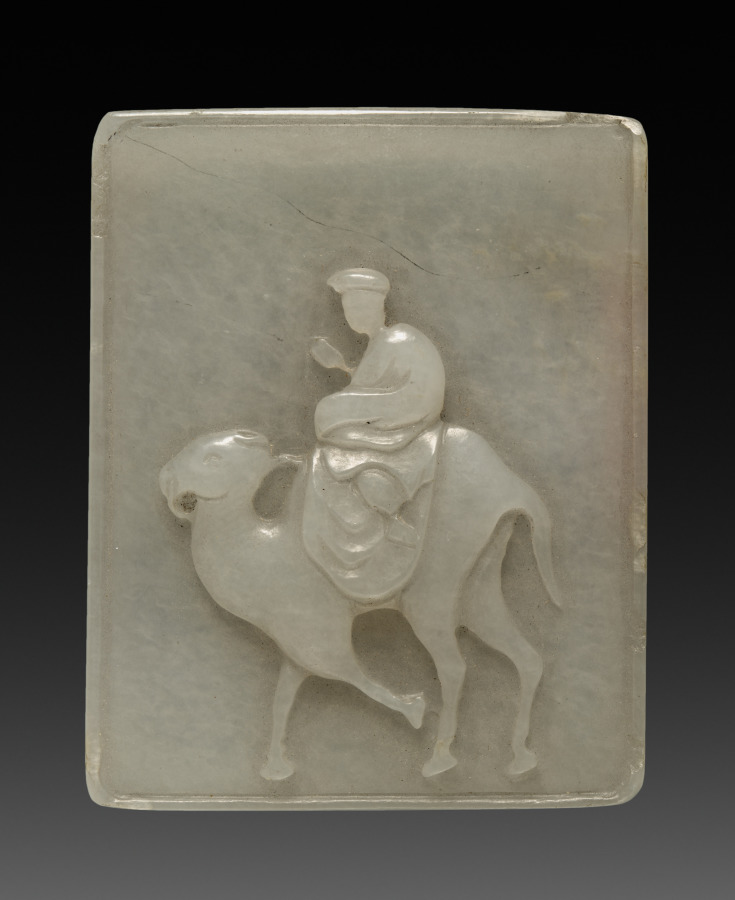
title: Seal Box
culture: China, Qing dynasty (1644-1911)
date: 1644–1700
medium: jade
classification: Jade